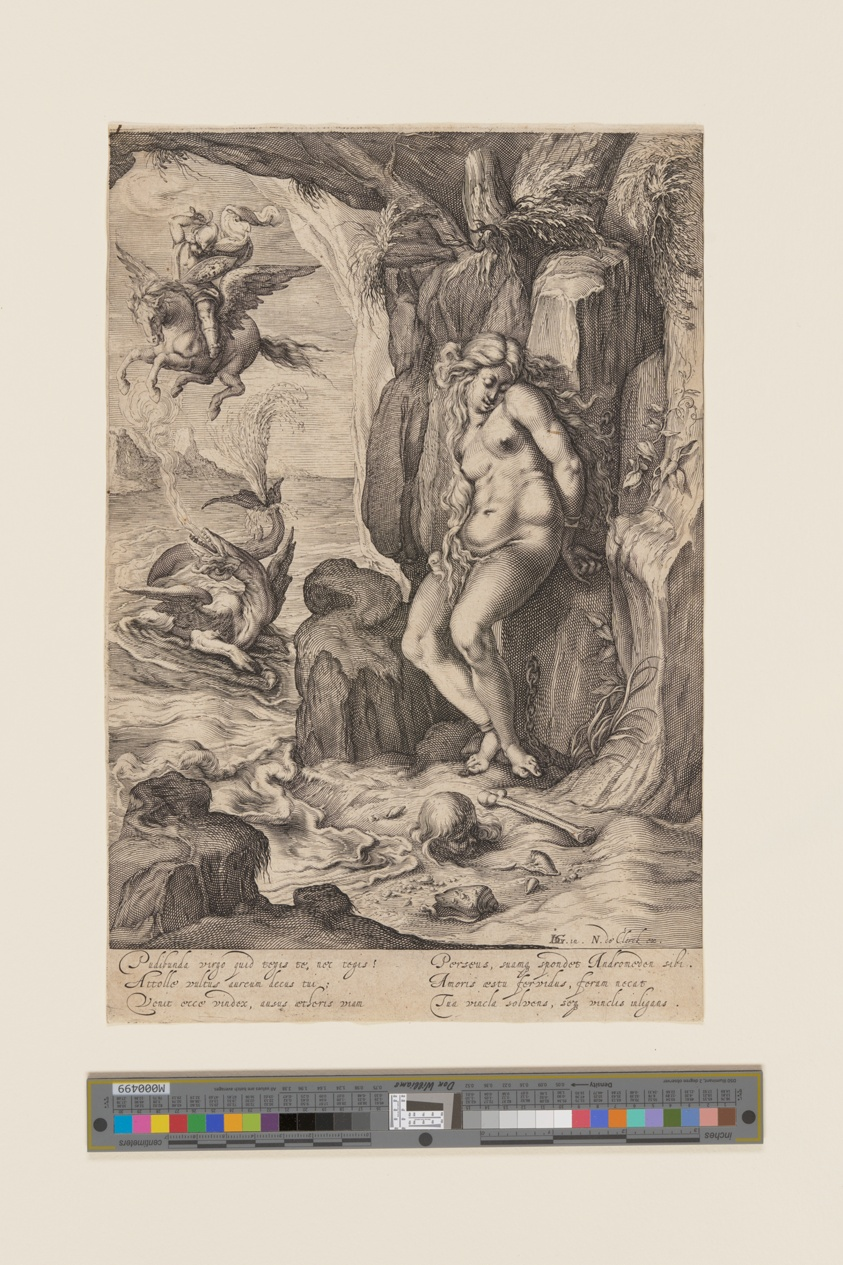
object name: Print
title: Perseus Liberating Andromeda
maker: Attributed to Andries Stock (Netherlandish, 1572/82-after 1648); after Jacques de Gheyn II (Dutch, 1565–1629)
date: c. 1610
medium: Engraving on ivory laid paper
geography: Netherlands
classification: engraving; paper; print; prints and drawing